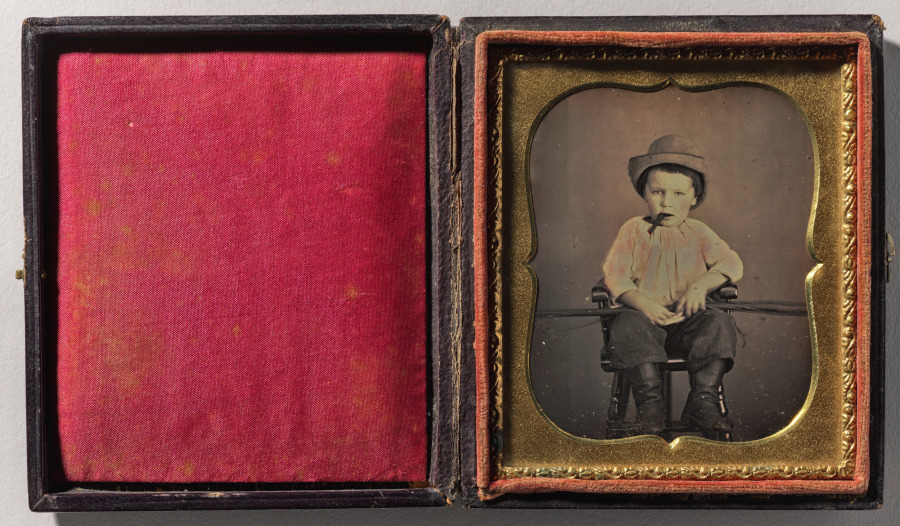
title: Boy with Cigar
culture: America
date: c. 1855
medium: daguerreotype, tinted, sixth plate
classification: Photograph